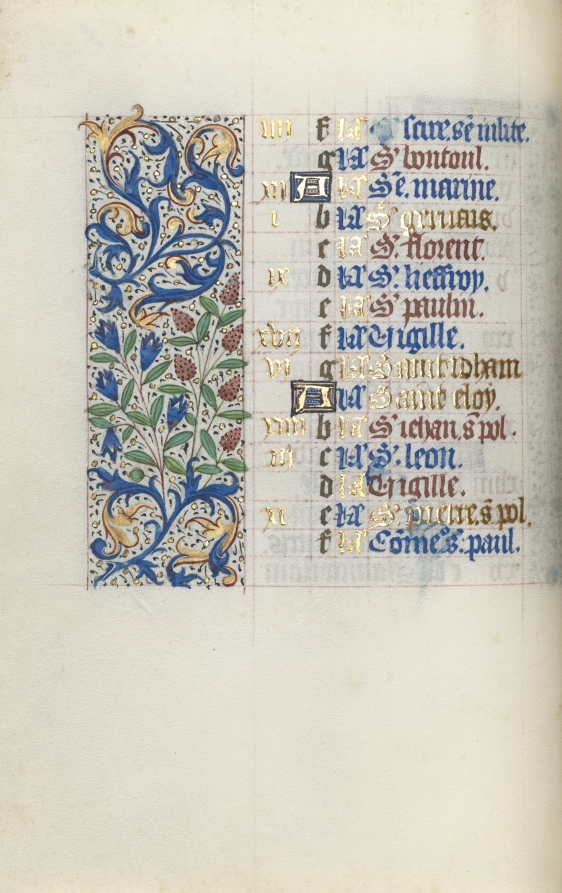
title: Book of Hours (Use of Rouen): fol. 6v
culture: France, Rouen, 15th century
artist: Master of the Geneva Latini (French, active Rouen, 1460–80)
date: c. 1470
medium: ink, tempera, and gold on vellum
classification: Bound Volume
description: In the late 1400s and early 1500s Rouen was an established and important center of book production. The city’s cathedral had a wealthy chapter that spent large sums of money to commission books and to maintain its extensive library. The stationers and booksellers would have likely been concentrated in or near the cathedral precinct. This artist, named after a manuscript now in Geneva, was Rouen’s principal illuminator during the second half of the 1400s.